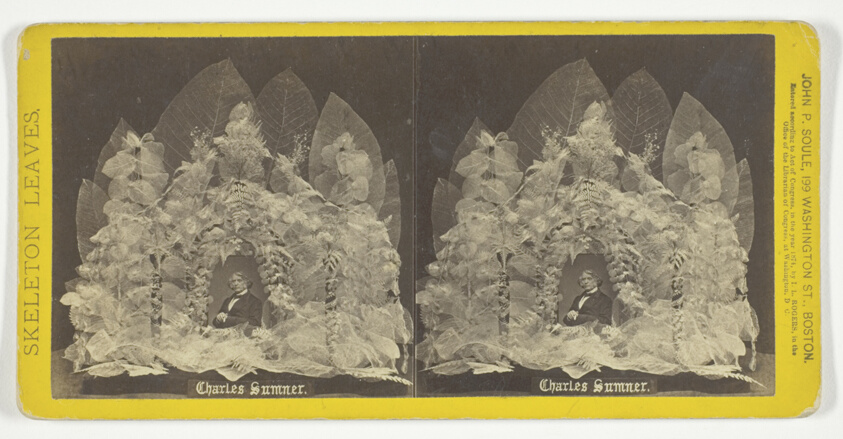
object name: Photograph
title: Charles Sumner, from the series "Skeleton Leaves"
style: 19th century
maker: John P. Soule (American, 1828–1904)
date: 1874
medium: Albumen print, stereo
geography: United States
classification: photography; photograph